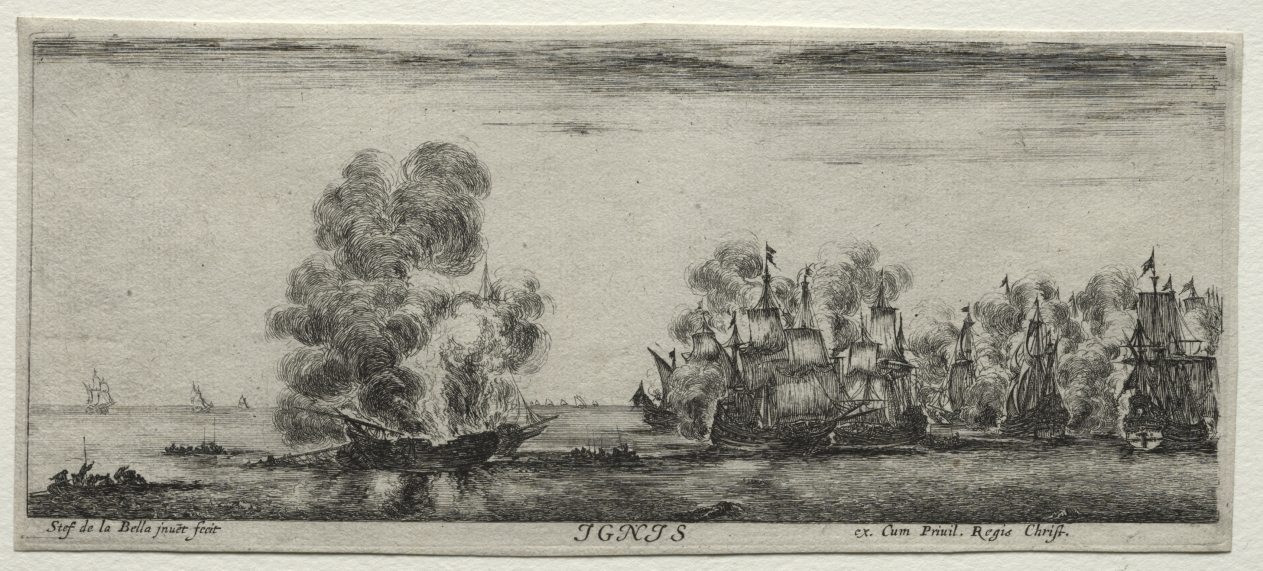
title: The Four Elements: Ignis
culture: Italy, 17th century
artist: Stefano Della Bella (Italian, 1610–1664)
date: c. 1648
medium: etching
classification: Print